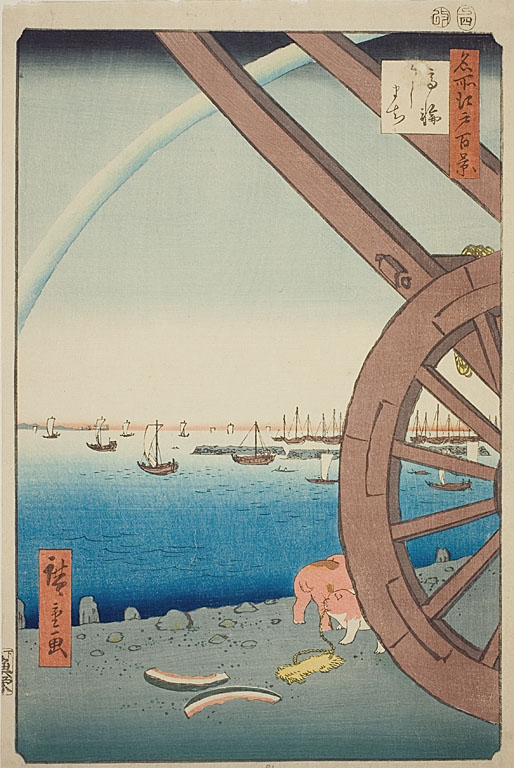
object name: Print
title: Ushimachi at Takanawa (Takanawa Ushimachi), No.81 from the series "One Hundred Famous Views of Edo (Meisho Edo hyakkei)"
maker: Utagawa Hiroshige (Japanese, 1797-1858)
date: 1857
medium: Color woodblock print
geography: Japan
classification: woodblock print; print; asian art